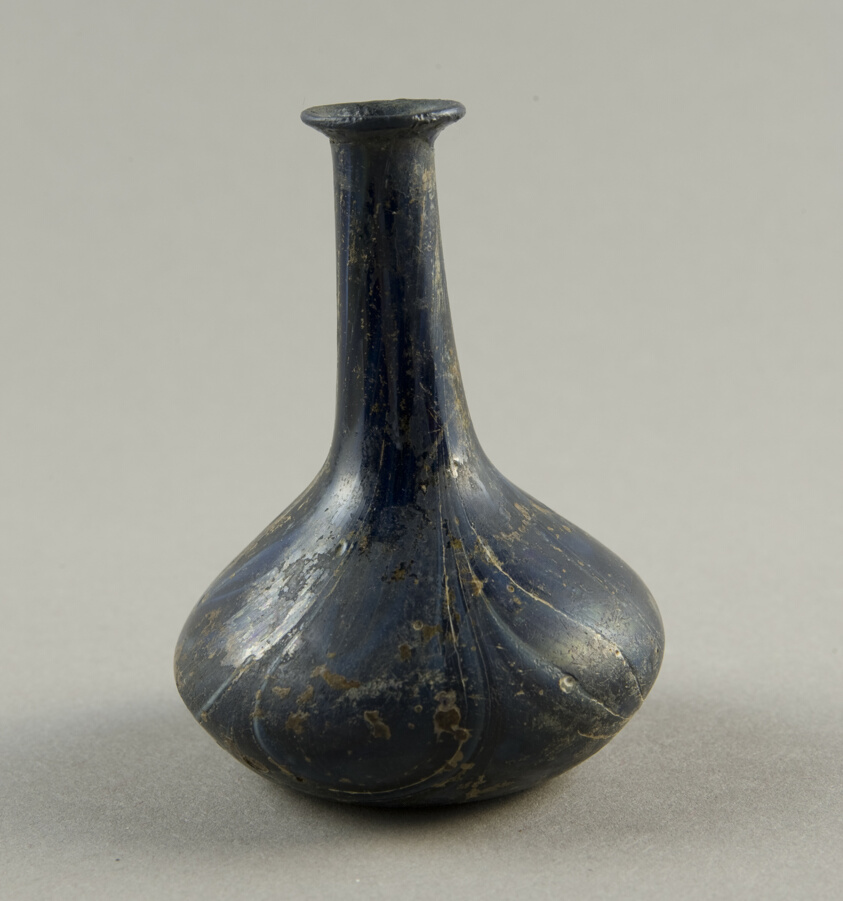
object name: Vessel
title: Bottle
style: syrian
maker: Roman; Levant or Syria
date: 1st century BCE-1st century CE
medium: Glass, blown technique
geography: Syria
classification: bottle; glass; vessel; ancient art